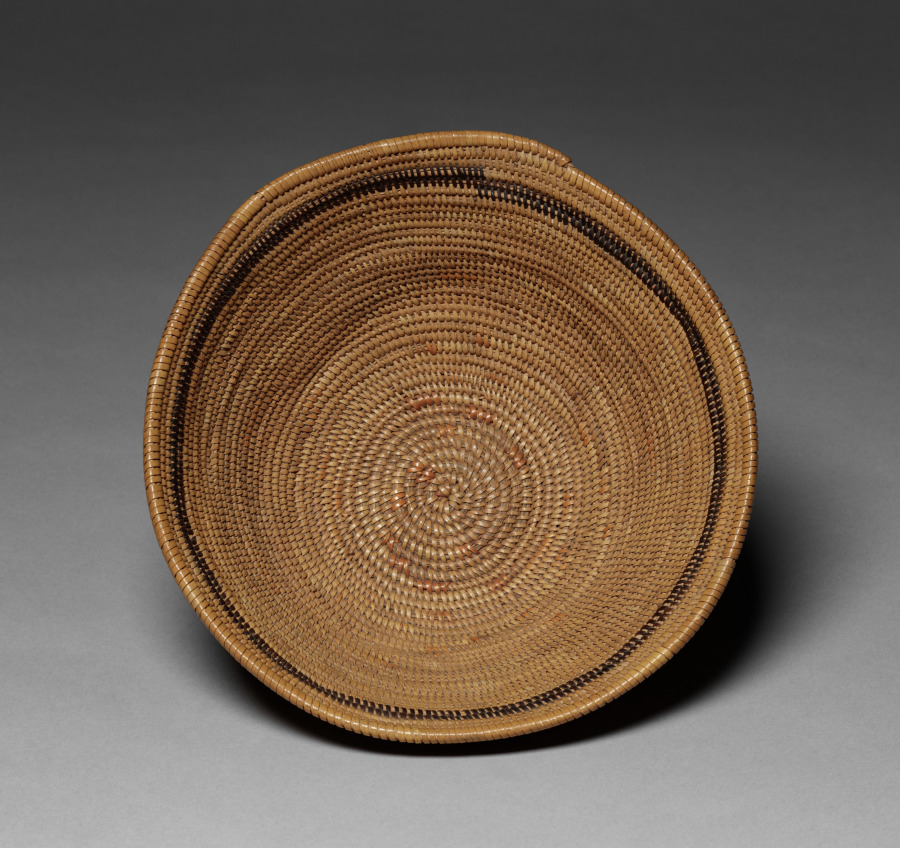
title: Hat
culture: California, Southern, Late 19th- Early 20th century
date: c 1875– 1925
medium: Juncus, Sumac; Coiled; Deergrass foundation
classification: Basketry